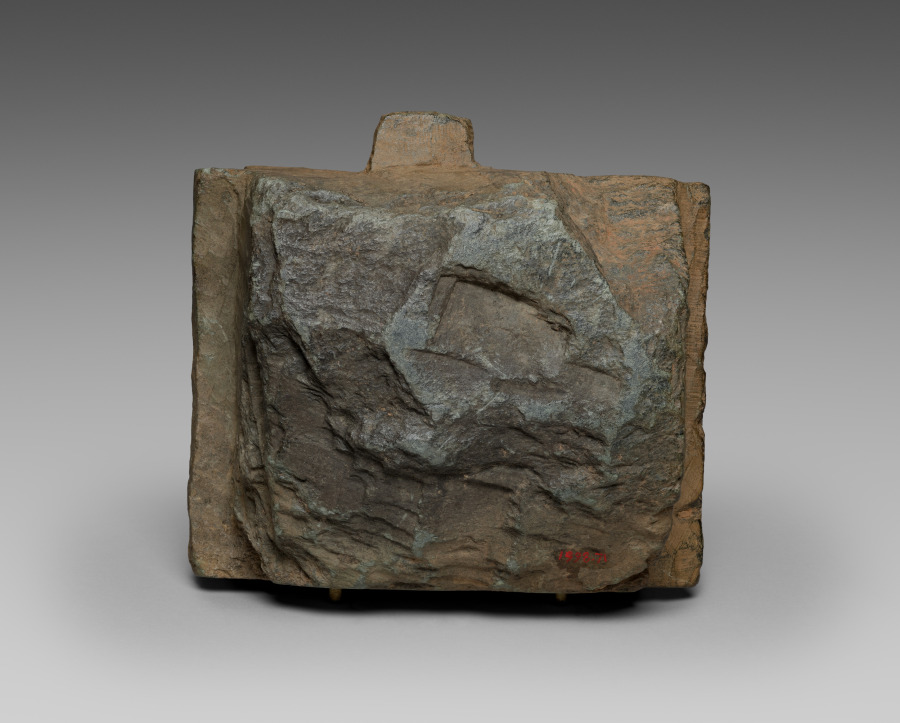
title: Architectural Bracket with Wrestlers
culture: Pakistan, Gandhara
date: 100s–200s CE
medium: schist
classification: Sculpture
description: This sculpture probably derived from Greco-Roman prototypes of nude athletes, but here it has probably been transposed into a scene from the boyhood of the Buddha, when it is said that he excelled in all forms of athletics.